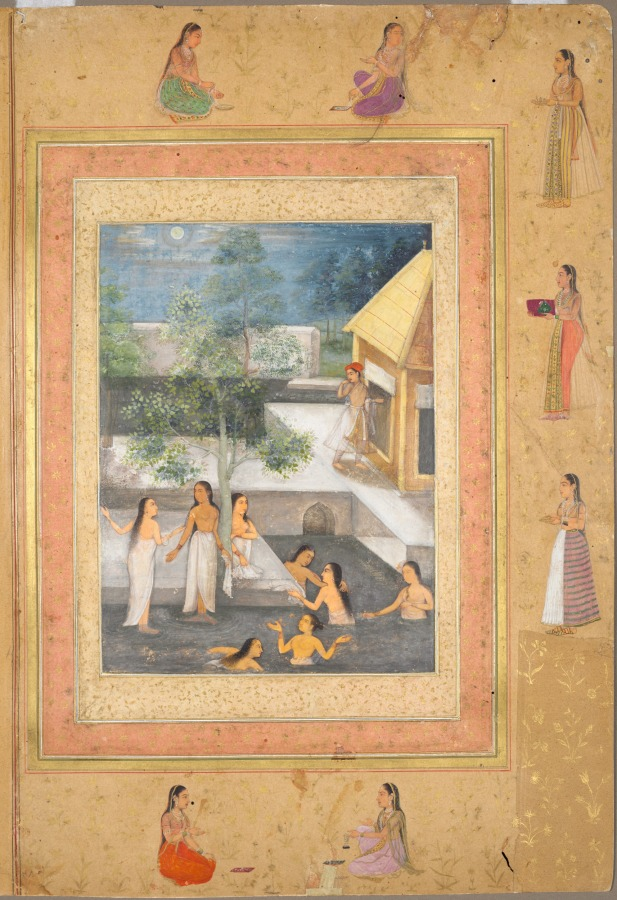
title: Leaf from the Late Shah Jahan Album: Harem Night-Bathing Scene (recto); Calligraphy Framed by an Ornamental Border of Flowers and Birds (verso)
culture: Mughal India, court of Shah Jahan (reigned 1628–58)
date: c. 1650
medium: Gum tempera, ink, and gold on paper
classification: Painting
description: The subject of women bathing persisted throughout the 1500s and into the 1600s. Akbar’s grandson Shah Jahan—the Mughal emperor who built the Taj Mahal—continued to support the work of artists in the imperial atelier. His taste was more formal and subdued, without as much interest in illuminations of fantastic tales. This scene is a single painting mounted in an album. The white marble terraces glow under the moonlight. An attendant carrying a cloth over one arm looks on with awe at the beauty of the scene. He is probably a eunuch, since men were not permitted to serve in the women’s quarters of a Mughal palace.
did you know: The lone male figure points to his mouth in a gesture of astonishment, perhaps at the beauty of the scene.